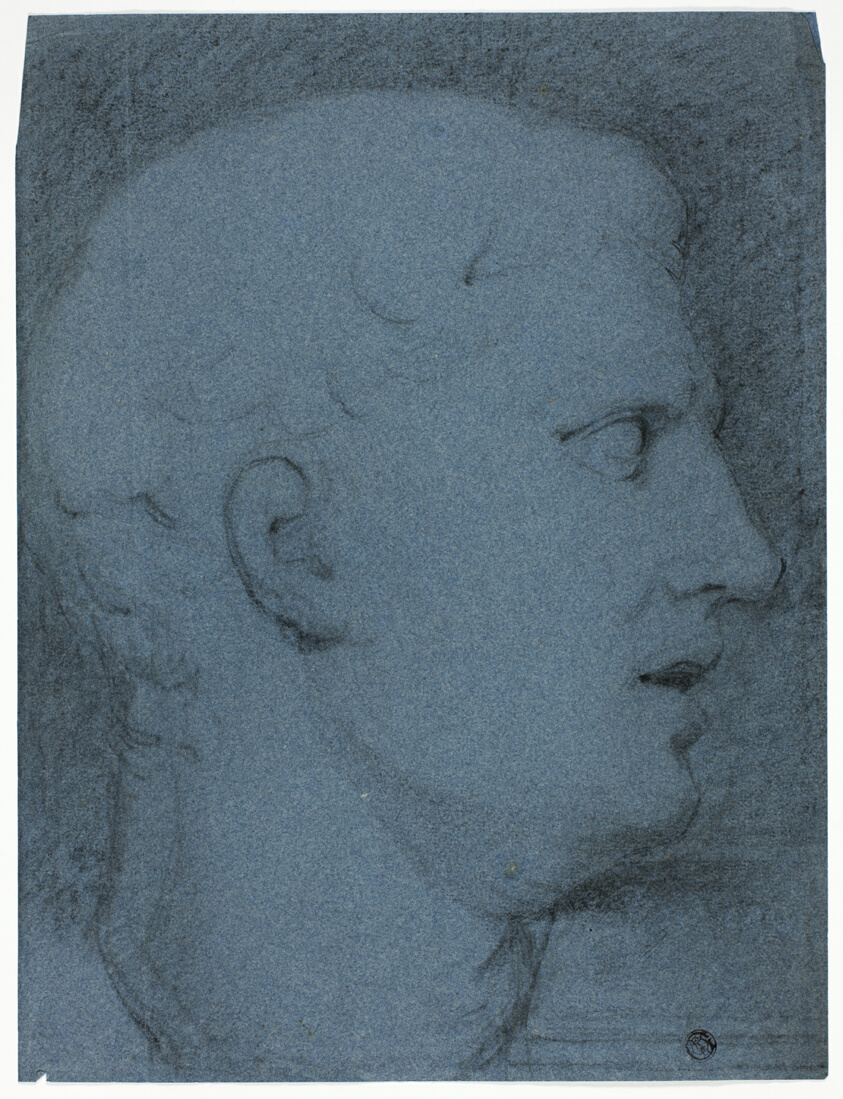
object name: Drawing and Watercolor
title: Profile of Head after a Cast (recto and verso)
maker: Attributed to George Henry Harlow; English, 1787-1819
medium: Charcoal (recto and verso) on blue wove paper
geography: England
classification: charcoal; paper; drawings (visual works); prints and drawing